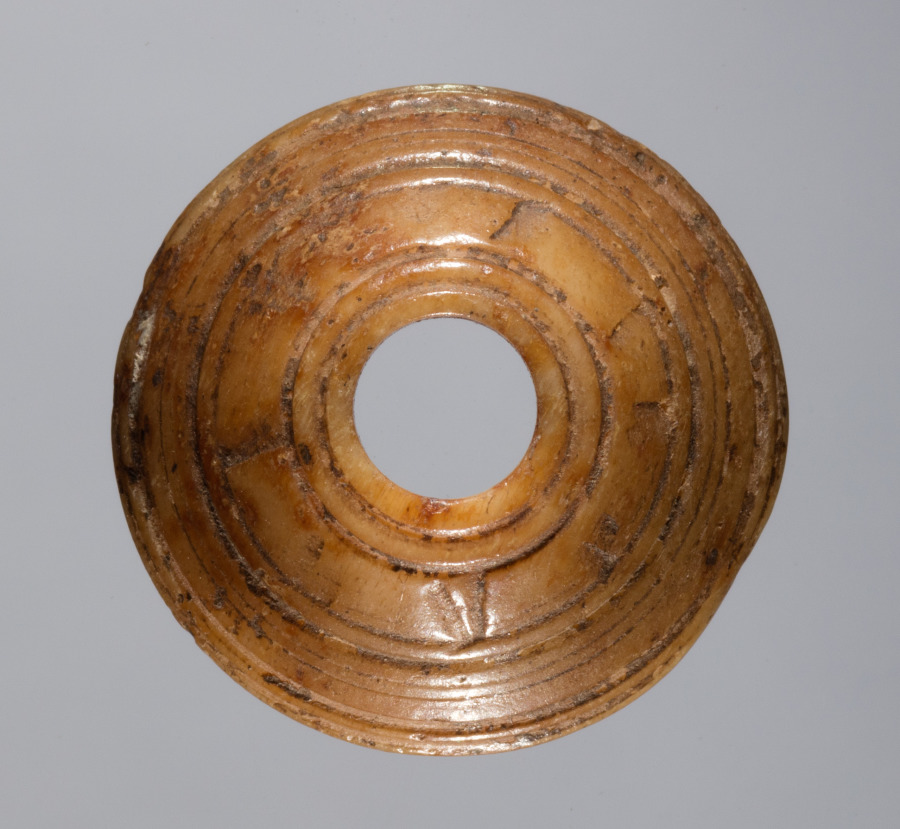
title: Spindle Whorl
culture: Iran, early Islamic period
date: 700s - 900s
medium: bone, incised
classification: Spindle Whorl